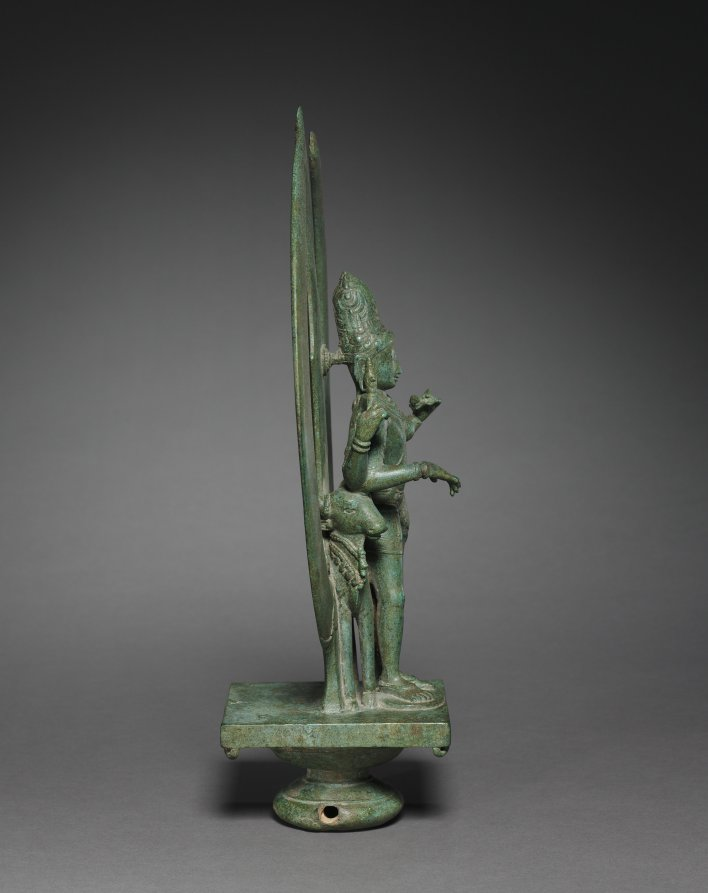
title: Trident with Shiva as Half-Woman (Ardhanarishvara)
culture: South India, Tamil Nadu, Chola period (900-13th Century)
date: c. 1050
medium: bronze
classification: Sculpture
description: The form of the trident—the main weapon of the Hindu god Shiva—dramatically and elegantly encircles his form in which the left side is female and the right side is male. The male side has the matted locks of a yogi piled high on his head; he holds an ax and leans on his mount, the bull. The female side has a jeweled crown, earring, full breast, broad hips, long skirt, and only one arm. The lower hands probably held a stringed instrument. This particular iconic form of Shiva visually indicates that he embodies all phenomena, even if they seem contradictory. He is male and female, destructive and creative, yogi and royal sovereign, hunter and musician.